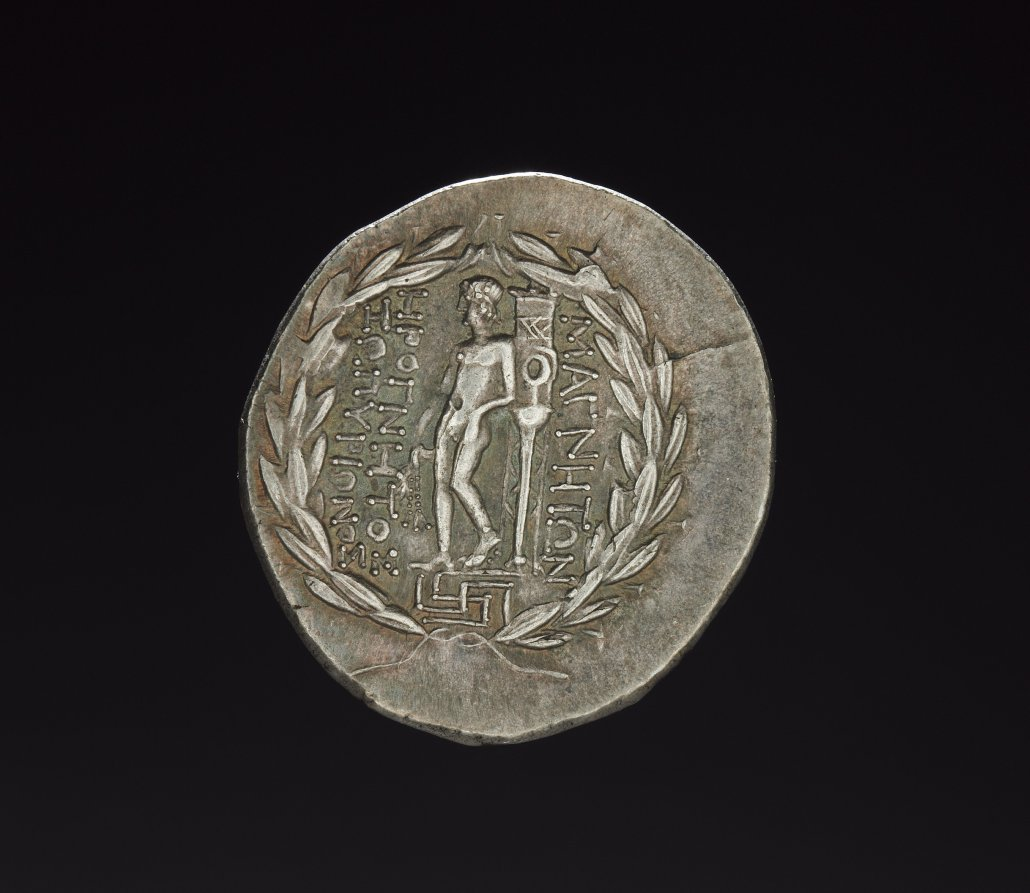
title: Tetradrachm Coin of Erognetos, Magistrate of Magnesia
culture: Turkey, Ionia, Magnesia on the Maeander, Hellenistic Period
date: 155–145 BCE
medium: silver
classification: Silver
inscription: MAGNETON EROGNETOS ZOPURIONOS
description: The front has a bust of Artemis, a diadem circling her head and a quiver over her shoulder. On the reverse is Apollo Delphios holding a laurel branch, standing on a meander pattern, and leaning his left elbow on a tripod, all within a laurel wreath. Magnesia is located southeast of Ephesus on a tributary of the Meander River.